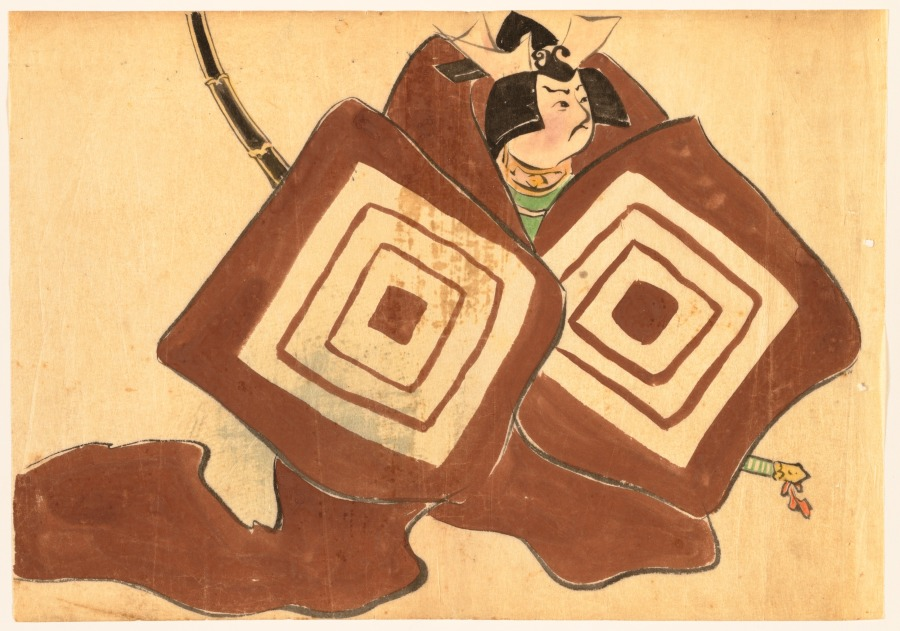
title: Flowers of a Hundred Worlds (Momoyogusa): Shibaraku (Shibaraku)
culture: Japan, Meiji period (1868–1912)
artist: Kamisaka Sekka (Japanese, 1866–1942)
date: 1909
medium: ink and color on paper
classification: Drawing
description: Kamisaka Sekka made preparatory drawings for his Flowers of a Hundred Worlds series on tracing paper with ink and color. The freehand sketches are much looser than the finished, printed compositions.